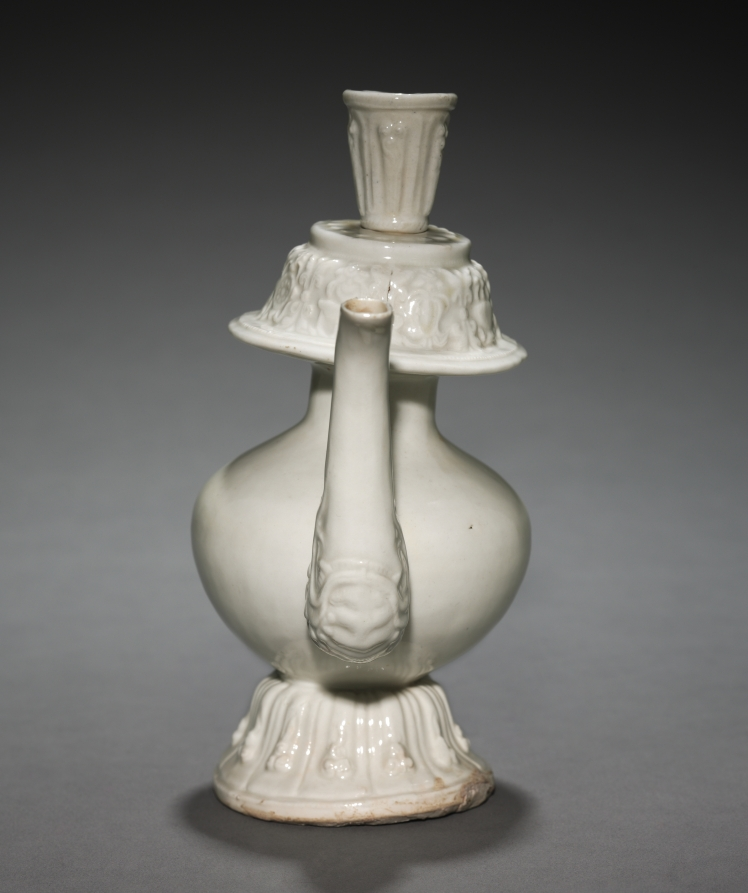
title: Ewer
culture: China, Yuan dynasty (1271-1368) - Ming dynasty (1368-1644)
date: 1300s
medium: porcelain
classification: Ceramic